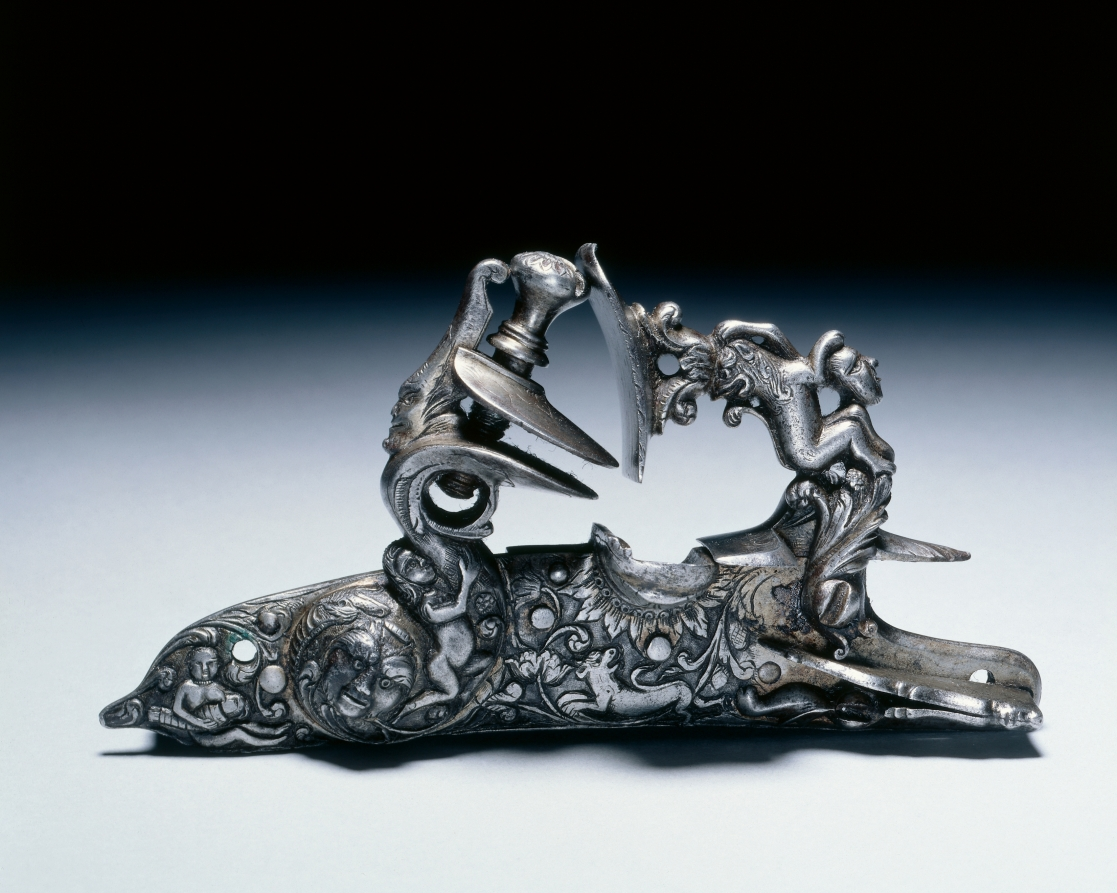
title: Snaphance Gunlock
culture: Italy, Brescia (?), 17th century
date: c.1660–80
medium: steel, chiseled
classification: Arms and Armor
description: The snaphance is a type of lock used for firing a gun. It is a predecessor of the flintlock mechanism.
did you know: This steel gunlock is its own work of art, chiseled with designs of grotesques, masks, and foliage.